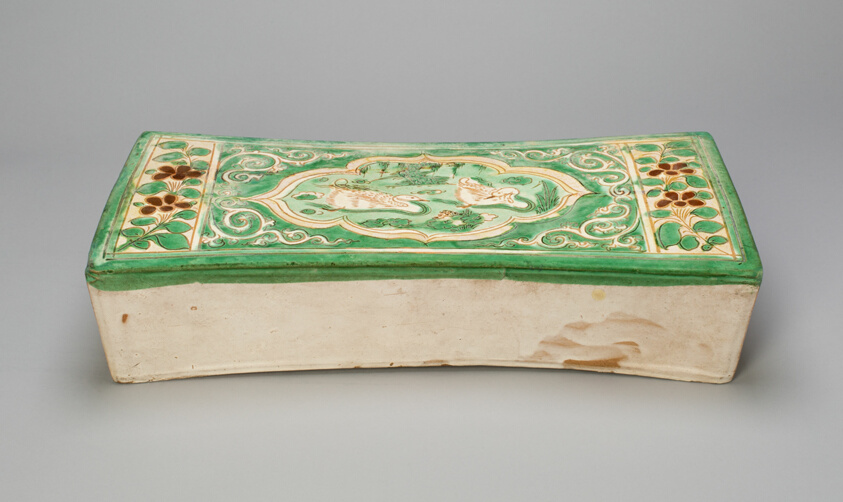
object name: Decorative Arts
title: Rectangular Pillow with Mandarin Ducks in a Lily Pond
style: Chinese (culture or style)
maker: China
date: Jin dynasty, (1115–1234), late 12th/13th century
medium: Cizhou ware; earthenware, slip-coated with green and amber-yellow glazes and carved and incised decoration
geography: China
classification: earthenware; ceramics; asian art; decorative arts